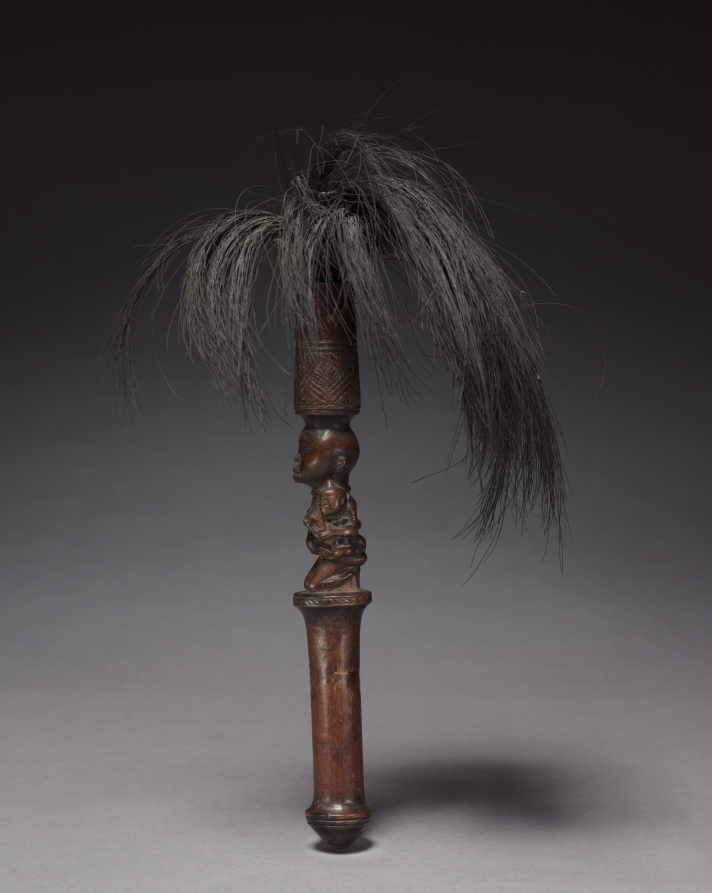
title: Flywhisk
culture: Africa, Central Africa, Democratic Republic of Congo (most likely), Cabinda, or Republic of the Congo, probably Yombe-style maker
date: late 1800s-early 1900s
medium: Wood and animal hair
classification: Sculpture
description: In Central Africa, flywhisks denoted status, rank, and function, rather than used to whisk away flies. Commonly associated with chiefs and titleholders, they were also owned by diviners and healers. Their purpose may also have been used to purify spaces, bless people, places, or things, and settle disputes. Flywhisks rarely depict women; yet this finely carved miniature of a woman kneeling signifies obedience and respect.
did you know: Rarely do flywhisks depict a female figure.